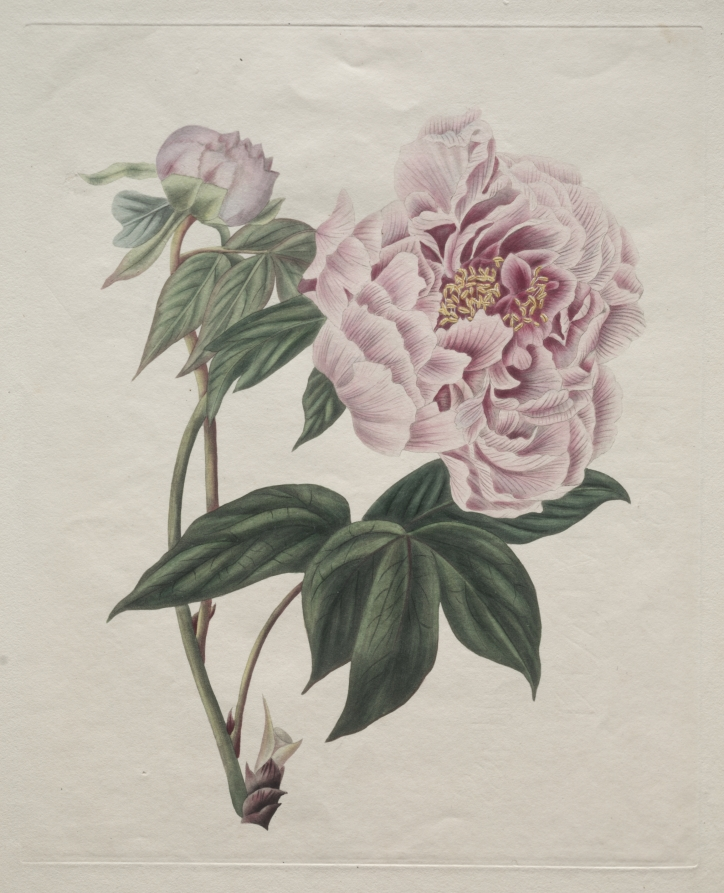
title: Chinese Tree Peony (Paeonia suffruticosa)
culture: England, 19th century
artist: Smith (British)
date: c. 1820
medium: engraving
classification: Print